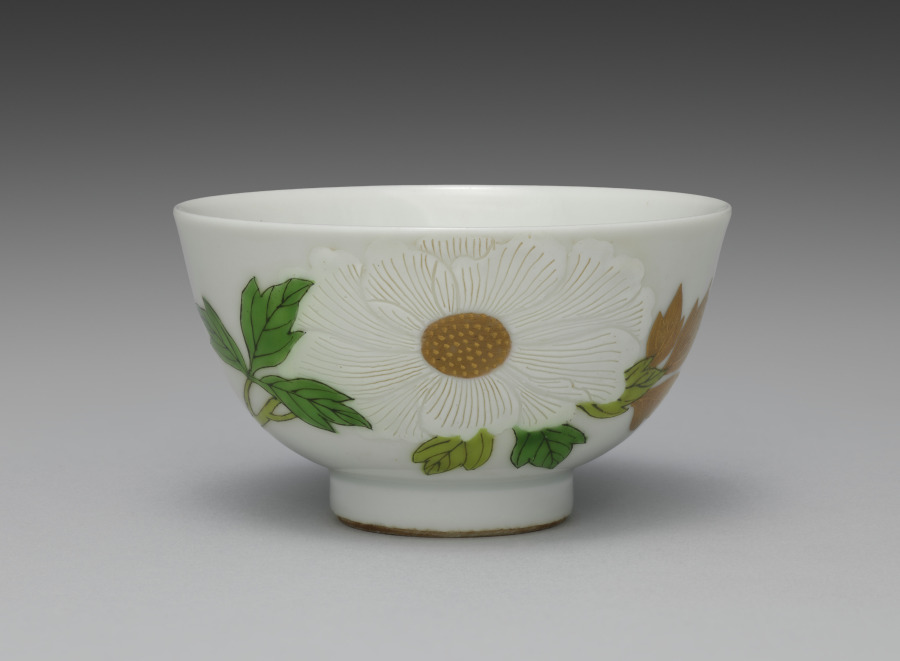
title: Teabowl from Teabowls with Peony and Crabapple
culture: Japan, Meiji period (1868–1912)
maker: Seifū Yohei III (Japanese, 1851–1914)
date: 1893–1914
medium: One from a set of five teabowls; porcelain with underglaze and overglaze color enamels and gold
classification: Ceramic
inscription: 清風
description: Overglaze color enamels are generally called iro-e (literally “color picture”) in the terminology customarily used for porcelain decoration of the Edo period. This set of teabowls is a fine example of Yohei III’s skilled use of the technique, which is identified on this set’s box lid with the alternate phrasing “porcelain with color painting” (jisaiga). Distinct from the way overglaze colors were used in Kakiemon ware from Arita, his designs and applications show a consciousness of porcelain decoration of the Qing dynasty. Here, he combines Chinese models with a sensibility taken from Kyoto ware precedents, including painting with powdered gold (kinrande). The colors used in the bowls are as follows: blue, black, gold, white, light green, green, and pink. The blue appears only inside the footring, as a double band of underglaze color. The black iron, used for stems and leaf veins, is painted over the glaze. The gold, also painted over the glaze, is used for leaves and the centers of flowers, for solid, glossy lines defining detail, or as a semimatte ground. Yohei has incised lines of varying widths into the pigment, carving away to the bowl’s surface, to differentiate individual petals and their rippled shapes. The light and dark greens, as well as the pink, are painted over the glaze. Of note is how Yohei has first used thinly applied lines of light green to draw the plum branch before applying the opaque iron black. For the plum buds and flowers, he has used a diluted pink with an opaque pink for outline, both over the glaze. In his later works, Yohei used pink both over and under the glaze in a manner similar to underglaze blue, and it can be challenging in some cases to discern which technique he has used. A lidded container in a private collection has a similar design but is augmented with the inclusion of white and purple magnolia blossoms. In contemplating the original decorative program of a set, of which these teabowls may have been a part, it is worth considering that perhaps not all objects included the full range of motifs. In such cases, the composition of the individual object may be best understood within the context of the extended ensemble. Here, the delicate pink plum on one side of the bowl seems slightly unbalanced with the bold white peony on the other, but when seen with other objects with the magnolia and its additional colors and shapes, it is possible to imagine a set with a complex, balanced design across multiple pieces.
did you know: The white of the peony flower is built up to a low relief over the glaze.